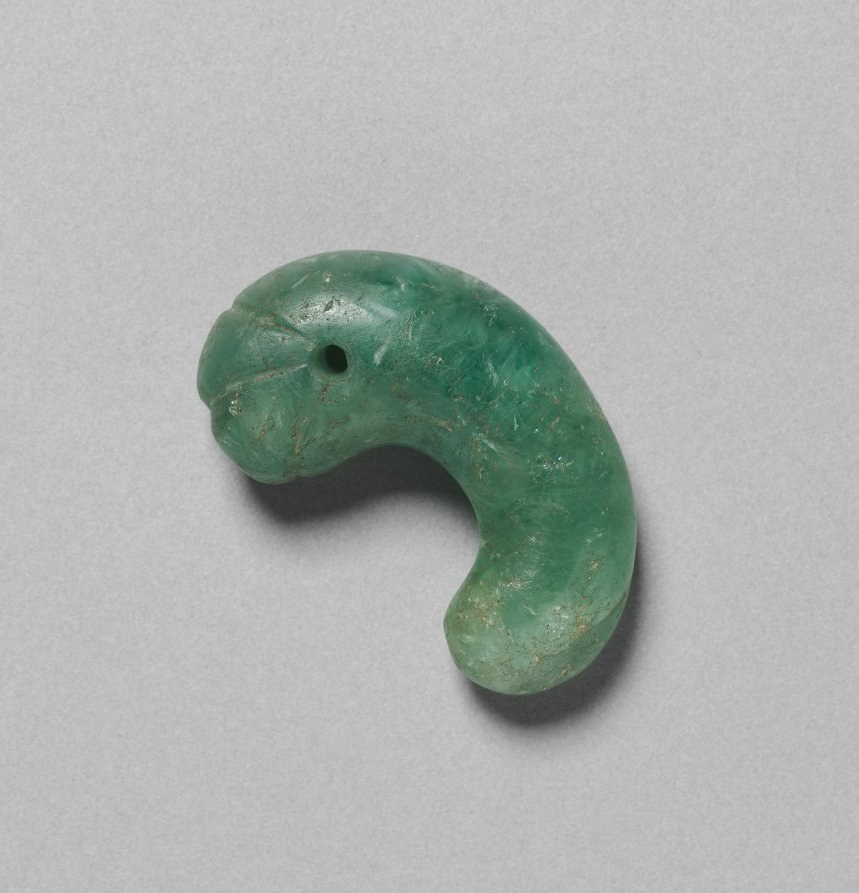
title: Comma-shaped Jade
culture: Korea, Three Kingdoms period (57 BCE–668 CE)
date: 400s CE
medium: glass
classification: Jewelry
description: Jade is one of the hardest stones and requires an intensive, arduous process of abrasion—cutting, chiseling, grinding, and polishing—to achieve the desired shape. A grindstone and a slurry of grit and water shape the jade into the desired form, and then a cloth dampened and rubbed with finer grit may have been used to give the jade the smooth surface. For the Silla kingdom (57 BC–985), in particular, comma-shaped jades served as an essential item for the burials of the ruling class and were luxurious accessories to decorate golden crowns. Their comma shape is thought to represent embryonic forms, symbolizing life, particularly rebirth in the afterlife.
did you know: This unique shaped jade was used as a pendant to decorate necklaces, eyerings, and crowns during the Three Kingdoms period.